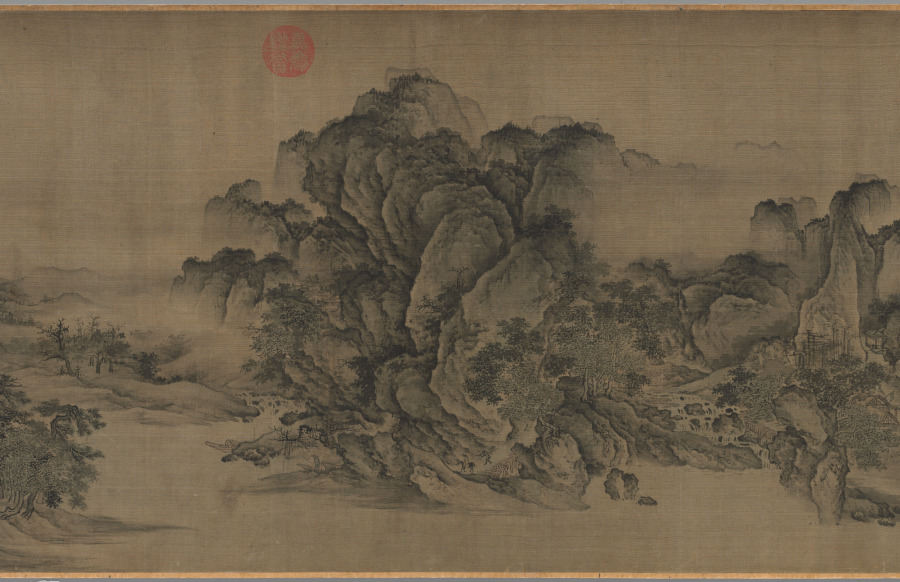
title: Streams and Mountains without End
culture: China, late Northern Song dynasty (960-1127) - Jin dynasty (1115-1234)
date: 1100–1150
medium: handscroll; ink and slight color on silk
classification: Painting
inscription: 9 colophons and 48 seals: 1 colophon, dated 1205, of Wang Wenwei 王文蔚 (dates unknown); 1 colophon, dated 1205, of Li Hui 李惠 (dates unknown); 1 colophon of Weiluo Tian Xie 蔚羅田獬 (dates unknown); 1 colophon, dated 1214, of He Yan 何言 (dates unknown); 1 colophon, dated 1326, of Cao Yuanyong 曹元用 (d. 1329) 1 colophon, dated 1332, of Kangli Zishan 康里子山 (Naonao; 1295-1345); 1 colophon, dated 1336, of Liu Zai 劉載. (dates unknown); 1 colophon, dated 1380, and 4 seals of Yang Mao 楊懋 (1300-after 1380); 4 seals of the Hou family (ca. 1340); 1 colophon of Wang Duo 王鐸 (1592-1652); 4 seals of Zhang Bingqian 張秉乾 (juren of 1729); 8 seals of Liang Qingbiao 梁清標 (1620-1691); 2 seals of the Qianlong emperor (r. 1736-95); 4 seals of the Jiaqing emperor (r. 1796-1820); 3 seals of the Xuantong emperor (r. 1909-11); 2 seals of Ye Gongchuo 葉恭綽 (1881-1968); 17 seals of Zhang Yuan 張爰 (Zhang Daqian 張大千, 1899-1983).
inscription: Colophon 1. Wang Wenwei 王文蔚. Dated third month and third day, 1205, under the reign of Zhangzong of the Jin dynasty. 造物元無心，山川秀氣聚。畫手亦無盡，各出新意度。 誰將妙林泉，淡墨寫縑素。重巒疊嶂間，三兩人家住。 茅舍隔素籬，小橋通細路。溪上數葉舟，雅有物外趣。 嵓崦藏招提，依稀認窗戶。山色四時宜，雲煙自朝暮。 不知塵世中，此景在何處。收拾買山錢，投老好歸去。 泰和乙丑三月三日平原王文蔚謹再拜，書于河東縣署之野趣堂。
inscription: Colophon 2. Li Hui 李惠. The colophon was written three days before the Qingming Festival in 1205. 畫師慣在山中居，含毫吮墨聊自娛。 閑將一段冰霜絹，寫出千里江山圖。 前山後山互出沒，山腰林樾相縈紆。 危橋澗溜瀉鳴玉，山根一匯為平湖。 波平短艇快漁釣，雲深細徑來樵蘇。 僊宮梵宇占幽勝，雕欄複閣森蓬壺。 往來行客煙靄外，飄飄野店青帘孤。 人家雞犬聲相接，熙熙化日安唐宇。 嗟余嗜好何其迂，膏肓泉石真吾徒。 一行作吏墮世網，薄書汨沒勞奔趨。 千巖萬壑但夢想，故園三徑應將蕪。 披圖暫洗黃塵眼，拊膺三嘆空踟躕。 泰和乙丑清明前三日絳臺李惠書于舜城府署之九思堂。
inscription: Colophon 3. Weiluo Tian Xie 蔚羅田獬. 畫工紛紛不可紀，擺脫俗流幾人耳。 夫誰援筆掃鵝溪，一段風煙且千里。 白波青嶂渺無窮，水接山兮山插水。 小橋野店相勾連，古寺樓臺突兀起。 飄然氣象與神俱，但患未明孰姓氏。 郭熙雖老典型存，為問主公無乃是。 此畫世希當寶藏，無與碌碌同一視。 更看卷首數公詩，奇絕清新相表裏。 蔚羅田獬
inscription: Colophon 4. He Yan 何言. Written in 1214. 萬有來自無，一真歸所託。畫師得三昧，胸中幻丘壑。 百態逐墨破，群形隨筆落。地近迹分明，天遙痕隱約。 雲物自吐吞，峯巒非斧鑿。江鄉閴無市，谷關常不鑰。 中有野夫閑，童琴而歩鶴。酒斾出籬懸，漁舟臨岸泊。 澗樹蔽橋樑，巖松迷殿閣。岑疊宿霧重，野曠林煙薄。 危棧接縈紆，亂泉通脈絡。途中人往來，僕馬何羸弱。 怪石虎踡跼，古木龍蟠錯。一幅宜好收，千金非易博。 玉堂閑卷舒，眼界增寥廓。視險尚寛平，見危除慘虐。 氣象溢國華，川澤資廟略。功名業已書，歸去鞭先著。 但知色即空，何是今非昨。飽乎仁智心，箇中無限樂。 貞祐甲戌秋暮，東營何言題。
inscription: Colophon 5. Cao Yuanyong 曹元用 (d. 1329). Dated 1326. 岸擁危橋斷，溪浮小艇斜。 萬山最深處，依約兩三家。 泰定丙寅秋，曹元用題。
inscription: Colophon 6. Kangli Zishan 康里子山 (i.e., Kangli Naonao). The colophon bears a date of 1332. 右溪山圖，意韻蕭灑。一見使人有烟霞之想，真可珍藏。又有□金諸名勝題詩其左。兵火之餘， 殊不易得也。 至順三年暮春之月，康里子山跋。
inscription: Colophon 7. Liu Zai 劉載. 雲拂埜田閑種玉，雨餘巖溜碎傾金。 幾時也結團茆去，麟閤恬然不挂心。 至元二年正月，長安劉載載之謹錄上。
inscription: Colophon 8. Yang Mao 楊懋 (1300–after 1380). 觀此圖，經營位置，筆法高古，山明石潤。其橋梁、路道、樹林、人物、遠近；一一誠得真山水之深趣。非當時名筆有大才者不能至此。不必問其誰何，可為神品。况宋金元三朝名公所跋，尚不能記，想其來尤遠矣。然而物經累變而尚存，是物之有壽者也。余不復再論。文顯其保之。洪武庚申春，八十翁楊懋觀。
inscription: Colophon 9. Wang Duo 王鐸 (1592–1652). 文蓀親翁博雅，文詩鴻暢。舍弟持此喜觀，遂抽管題數語： 山勢委折，筆墨無痕。宋人中如此不多見也。譬之兵家，當是韓白。王鐸。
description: Streams and Mountains without End was a landmark acquisition of 1953, made just a year after Sherman Lee had returned to Cleveland as curator of Oriental art. He acquired it with the intention to provide "a more than adequate foundation for a fine collection of Chinese landscape painting." This impressive work demonstrates the culmination of stylistic developments in Chinese monumental landscape painting following the Northern Song tradition. It represents a journey through a landscape, making it a fitting metaphor for Lee’s journey of discovery and achievement over a lifetime.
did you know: The portrayal of the distant lands is rich with details like pavilions, villages, and human activities.